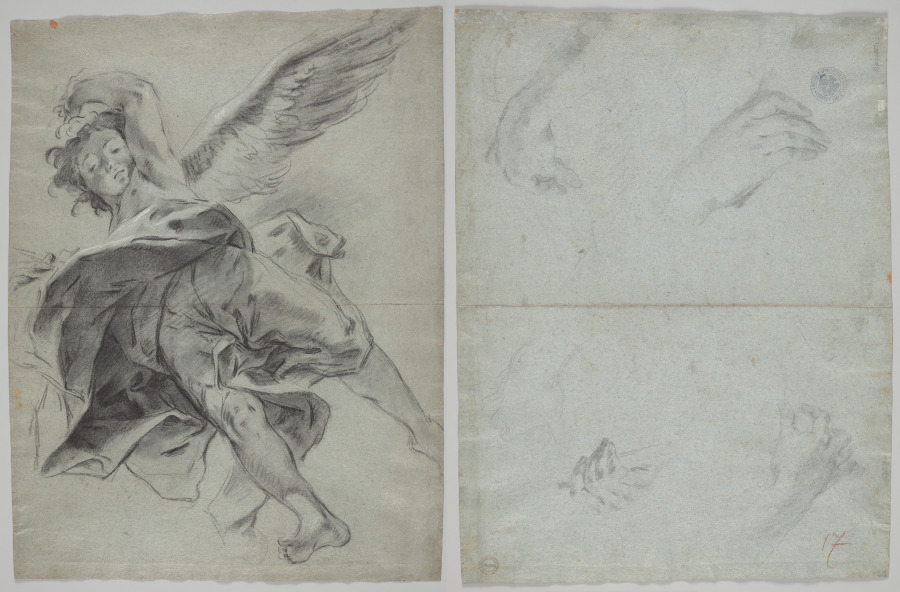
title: A Flying Angel (recto); Studies of Hands Playing Instruments (verso)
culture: Italy, Venice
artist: Giovanni Battista Piazzetta (Italian, 1682–1754)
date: 1723–27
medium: black chalk heightened with traces of white chalk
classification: Drawing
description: This drawing was completed in preparation for the most prestigious religious commission of Giovanni Battista Piazzetta’s career, the ceiling painting of the Glory of St. Dominic for the church of SS. Giovanni e Paolo in Venice. Both the finished painting, which depicts St. Dominic’s arrival in heaven amid a thundery vortex, and Piazzetta’s study for the angel, who carries St. Dominic on a cloud, depart from Venetian tradition. To execute this airborne subject, he likely drew from wax or clay models suspended in midair in order to study the illusionistic di sotto in su (from below to above) perspective and the play of light found on the angel’s shadowed form. He worked out the angel’s twisting pose, imbuing it with a lively sense of movement, and accentuated the drapery’s folds with heavy lines as though considering their visibility from afar. There are only slight changes in the angel’s pose between this drawing and the completed painting. As few of Piazzetta’s preparatory studies for paintings exist, Cleveland’s sheet offers rare insight to the artist’s working methods.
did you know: The Venetian blue paper (carta azzurra) of this sheet was the preferred medium for preparatory drawings among artists in Venice at the time this drawing was made.